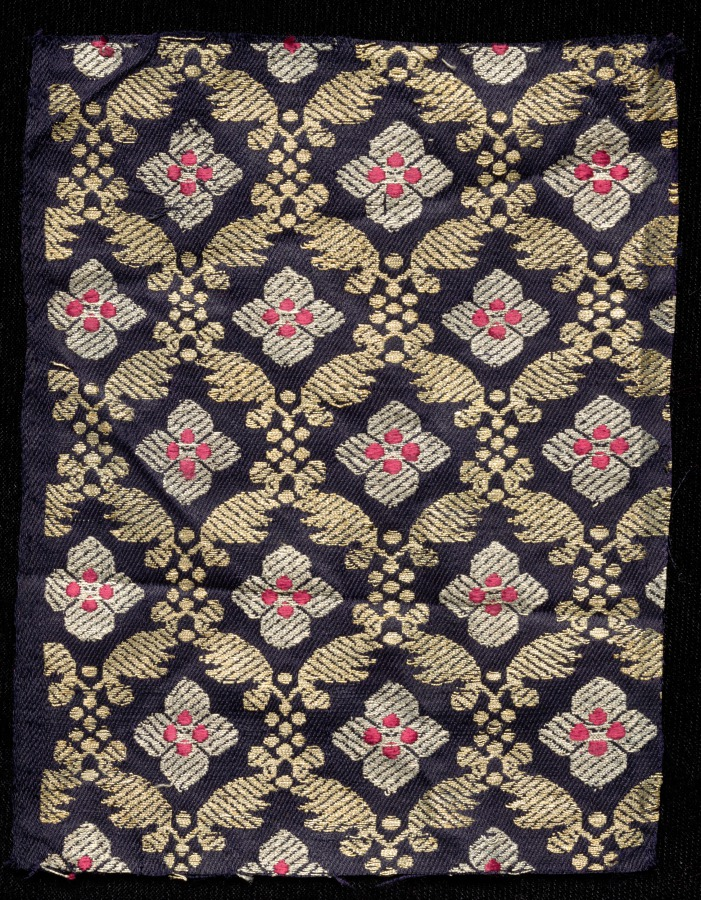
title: Fragment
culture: India, 19th century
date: 1800s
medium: brocade, "kimkhwab"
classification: Textile